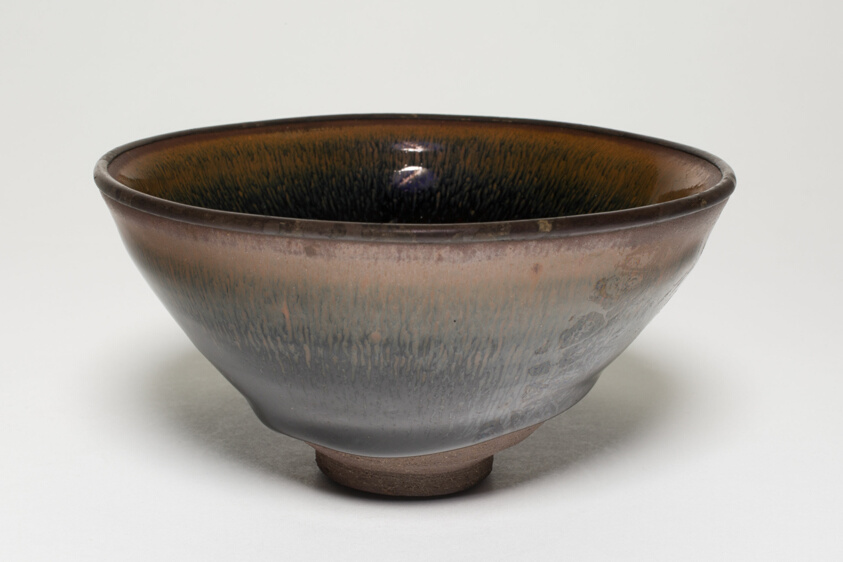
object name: Decorative Arts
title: Tea Bowl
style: Chinese (culture or style)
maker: China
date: Song dynasty (960–1279), 12th/13th century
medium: Jian ware; stoneware with dark brown "hare's fur" glaze and metal rim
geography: China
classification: drinking vessel; stoneware; asian art; ceramics; decorative arts